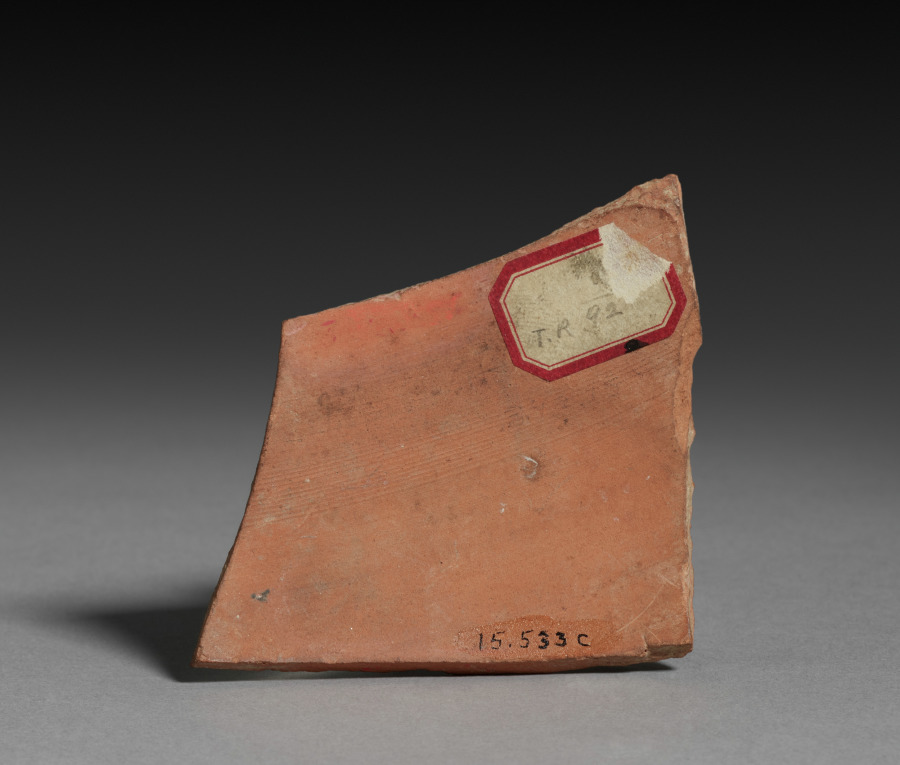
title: Fragment from Black-Figure Neck-Amphora (Storage Vessel): Satyr and Horse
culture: Greek, Attic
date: c. 520–510 BCE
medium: ceramic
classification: Ceramic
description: This small fragment preserves part of a harnessing scene. At left is part of the muzzled head of a horse, guided by a red-bearded satyr wearing a wreath. Before him are the hands of a charioteer—perhaps Dionysos—holding reins and a goad, with a branch in the background. The unfinished interior identifies this as part of a closed vessel, likely a neck-amphora.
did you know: Greek horsemen often muzzled their horses to prevent biting.